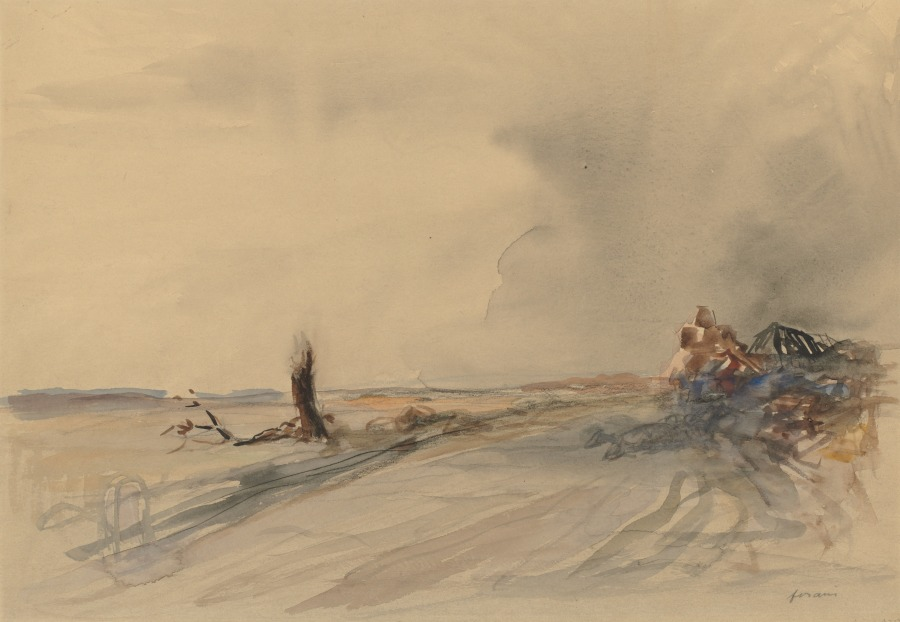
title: Devastated Land (recto); Figures in a Landscape (verso)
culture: France, 20th century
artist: Jean Louis Forain (French, 1852–1931)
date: c. 1919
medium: gray wash, watercolor, and gouache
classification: Drawing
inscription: signed, lower right, in graphite: forain ; lower right, in graphite: A2175